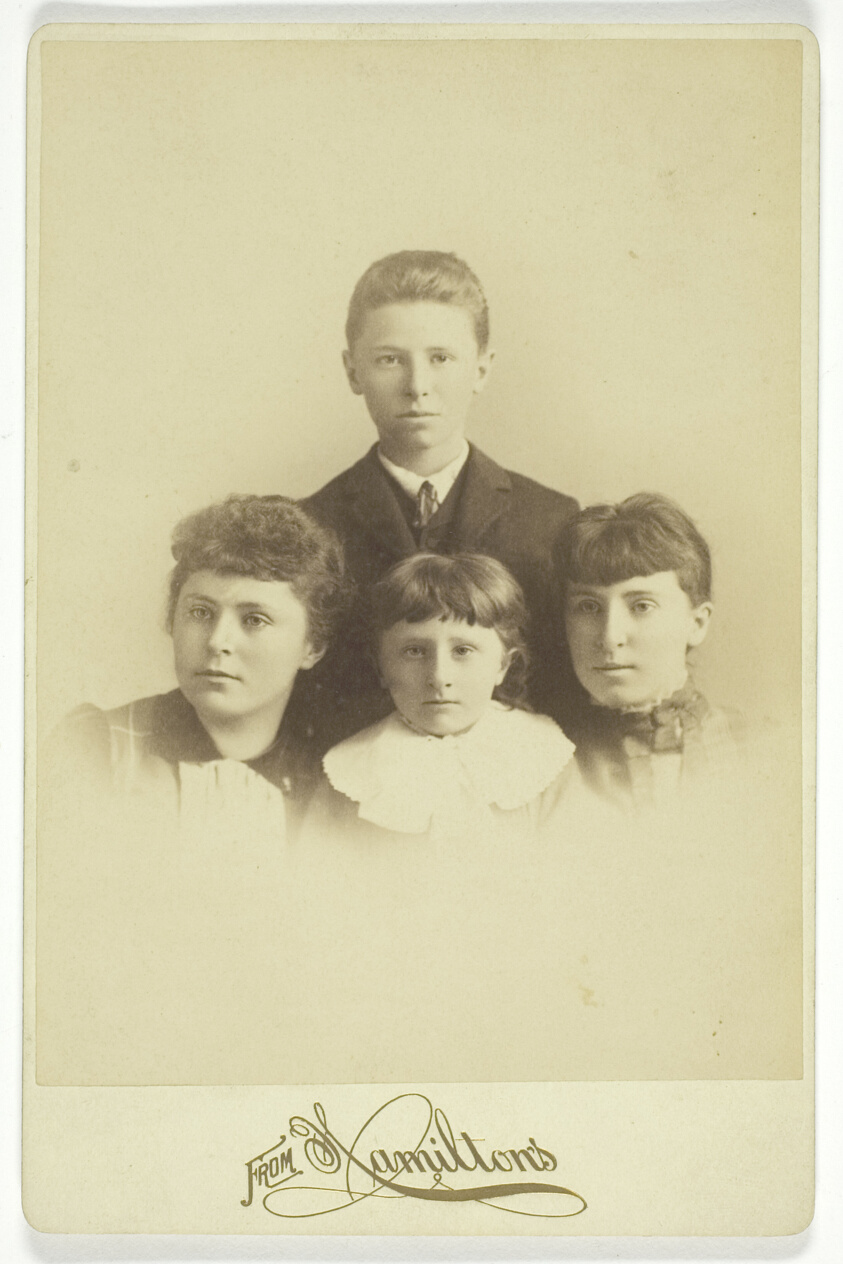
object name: Photograph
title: Untitled (Portrait of Four Children)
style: 19th century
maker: Artist unknown; American, 19th century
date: 1850/1899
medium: Albumen print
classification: photography; photograph